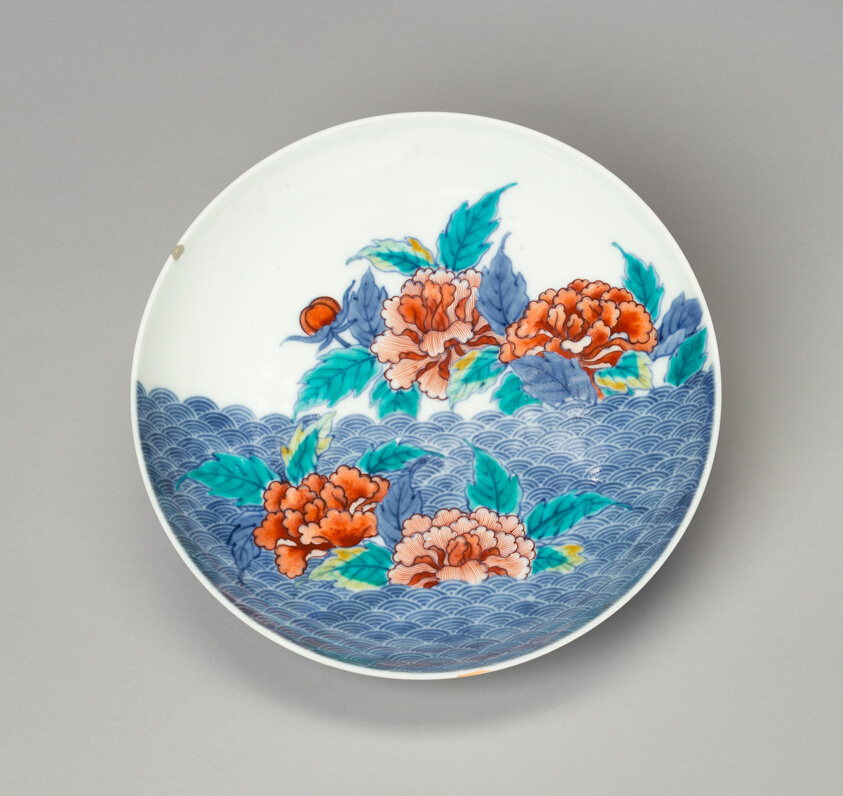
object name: Vessel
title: Nabeshima-Ware Bowl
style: Japanese (culture or style)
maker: Japan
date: 18th/19th century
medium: Porcelain with enamel decoration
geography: Japan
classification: bowl; porcelain; dish (vessel); asian art; ceramics; vessel